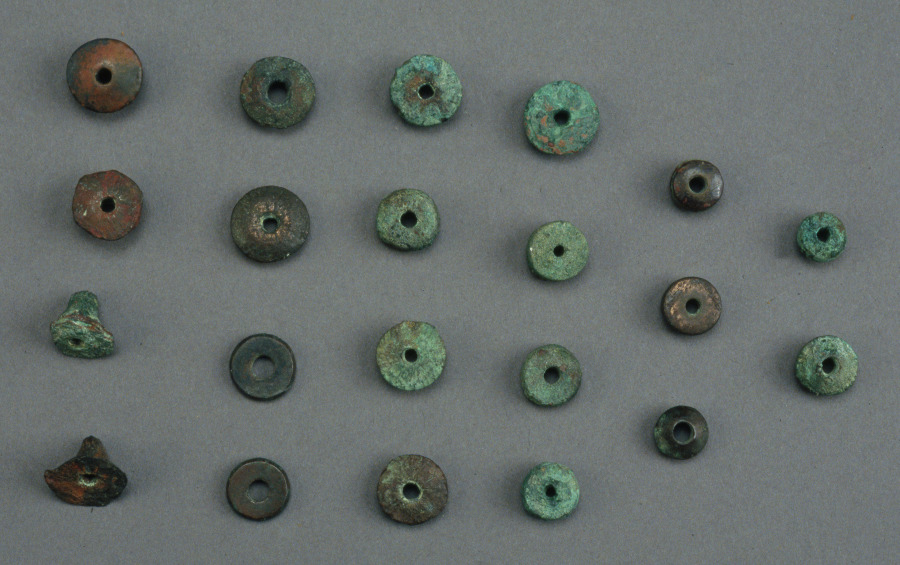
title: Medallion, beads, and spindle whorls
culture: Central Andes, North Coast, Chimú (medallion)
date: 1000–1532 (medallion)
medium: bronze, copper, silver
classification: Jewelry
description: This medallion and dozens of smaller beads and spindle whorls arrived at the museum strung on modern cord. Pierced with a hole at the top, it could have been suspended from a necklace or attached to a backing, such as a textile. It comes from Peru’s north coast and was made in the late pre-Hispanic period; the dates of the smaller beads are less clear.